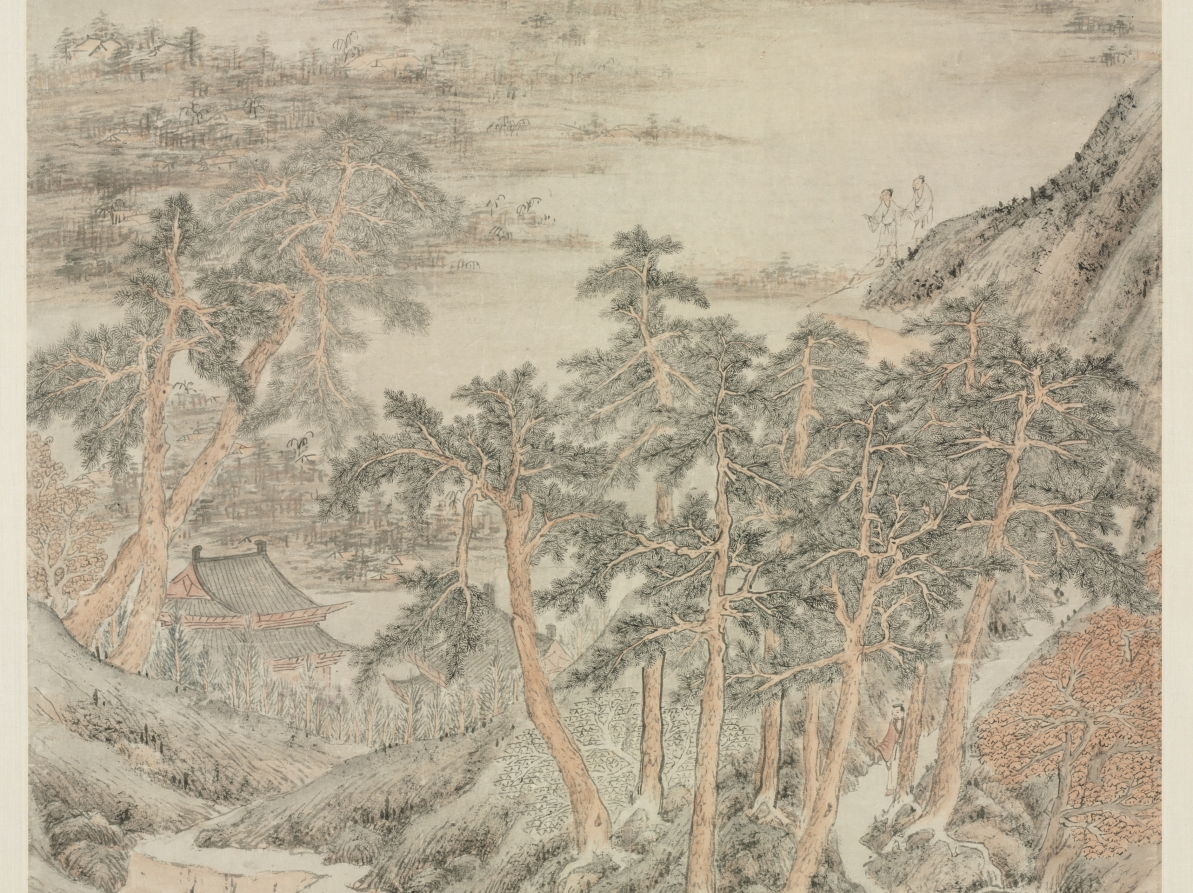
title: Washing the Feet (from the Dusty World)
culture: China, Ming dynasty (1368–1644)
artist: Wen Boren (Chinese, 1502–1575)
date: 1570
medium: Hanging scroll mounted on a panel; ink and color on paper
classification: Painting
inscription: Artist's inscription, signature, and 4 seals: Shaking one's clothes on a thousand-jen peak,/ Washing one's feet in a ten-thousand-li stream. In the gengwu year of the Longqing era [1570], fifteenth day of the tenth month, Wufeng shanren, Wen Boren recorded a special occasion. [2 seals] Wufeng shanren; Wen Boren Te-ch'eng chang. [2 seals, lower right corner] Te-ch'eng; She-shan chang. trans. HR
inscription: 2 additional seals of Zhang Heng 張珩 (1915-1963)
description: A scholar on a boat in the middle ground bathes his feet in the cooling stream. The vast river scene is depicted from a high viewing point. The motif of a scholar washing his feet illustrates the phrase, “When the waters of the Canglang are clear, I wash my capstrings. When the waters of the Canglang are muddy, I wash my feet [only]” (from Songs of Chu, written before 256 BC). The passage evokes the image of the virtuous scholar-official who avoids government service when the ruler is corrupt (the rivers are muddy) and resumes service (washing my capstrings) when the waters are clear. Whether the artist here alludes to unfavorable times of government is not clear.